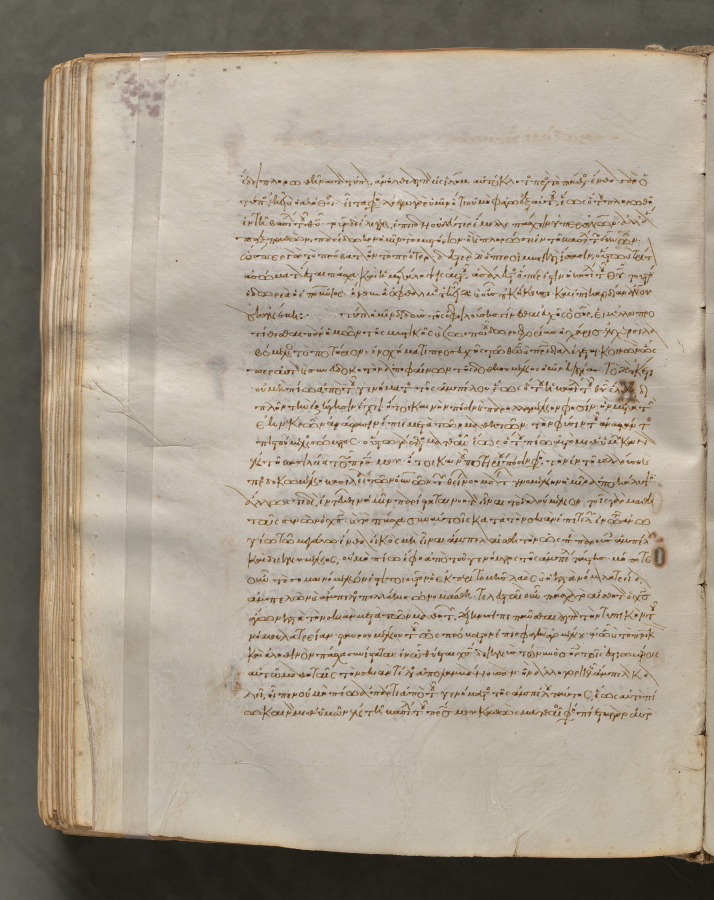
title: Text, folio 307 (verso), from a Gospel Book with Commentaries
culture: Byzantium, Constantinople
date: c. 1000–1100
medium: ink, tempera, and gold on vellum; leather binding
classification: Bound Volume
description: Each of the four gospels in this book opens on a page with brilliantly illuminated borders depicting the author of the text as well as birds—principally peacocks, symbols of the immortality of the soul—and fountains, representing the fountain of life and the salvation of the soul. This volume consists of 428 leaves with texts in Greek. Its level of sophistication suggests that it was probably written and decorated in a monastery in Constantinople.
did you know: Gospel books were carried in procession through Byzantine churches.